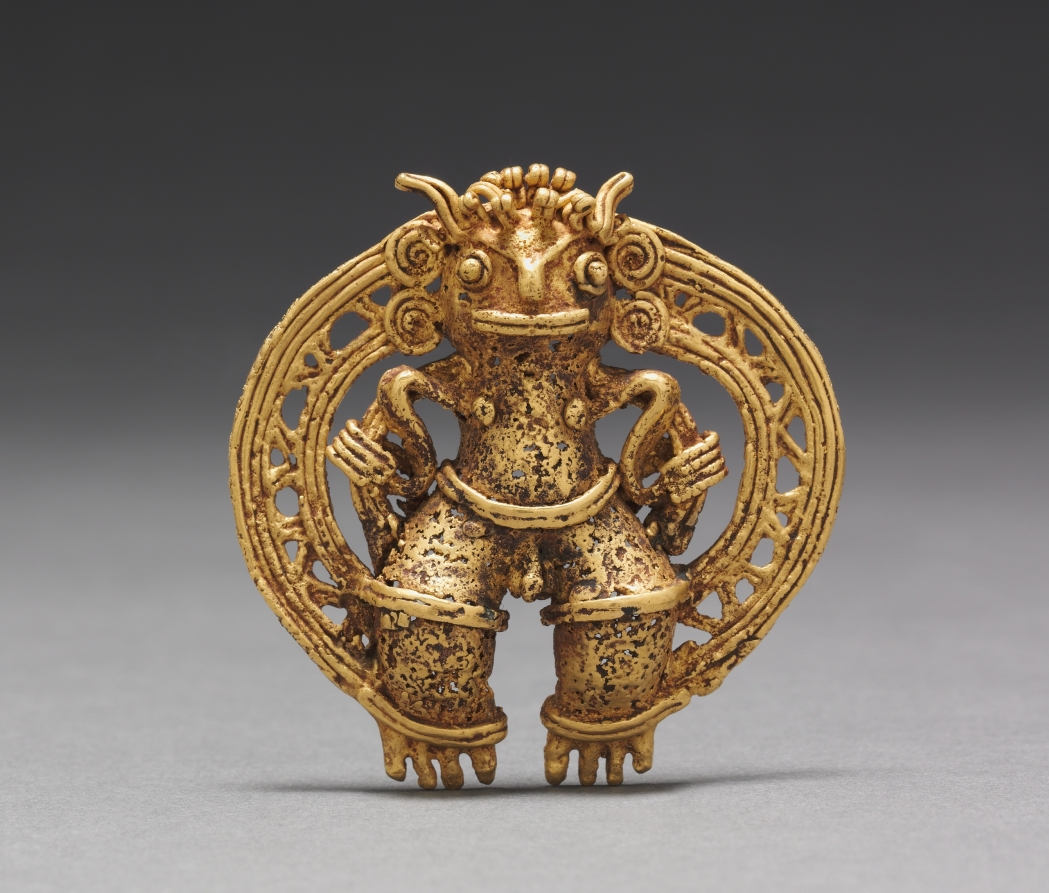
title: Figure Pendant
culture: Southern Costa Rica, (Diquís Region), Diquís Style, 11th-16th century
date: c. 1000–1550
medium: cast gold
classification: Metalwork